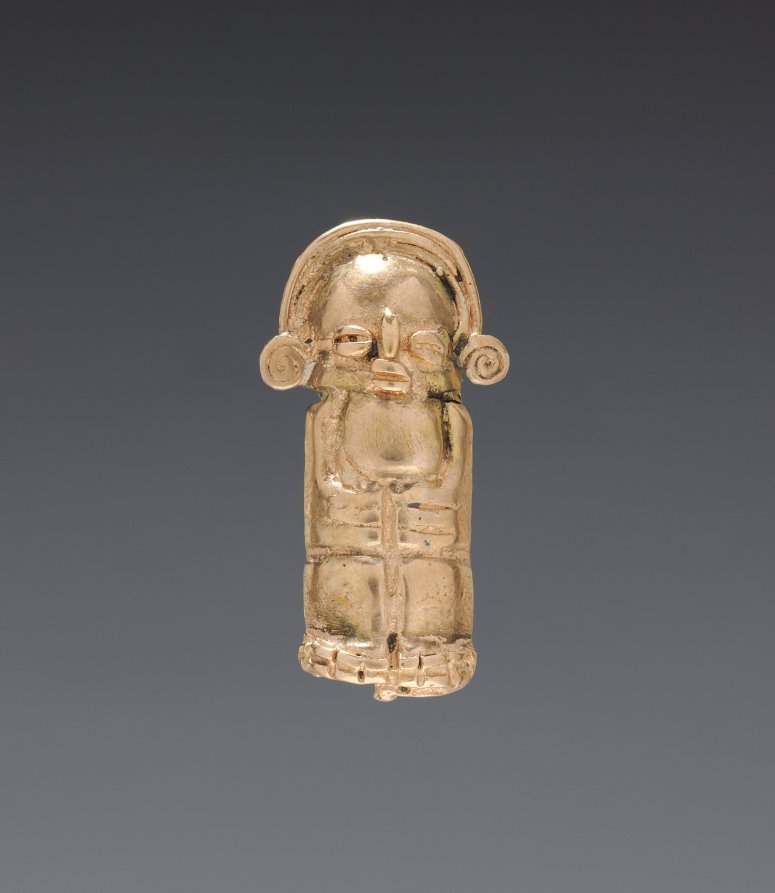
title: Necklace Figurine Bead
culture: Colombia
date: 1–700 CE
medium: cast gold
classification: Jewelry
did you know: Working with gold dates back to at least 500 BC in Ecuador and Colombia.